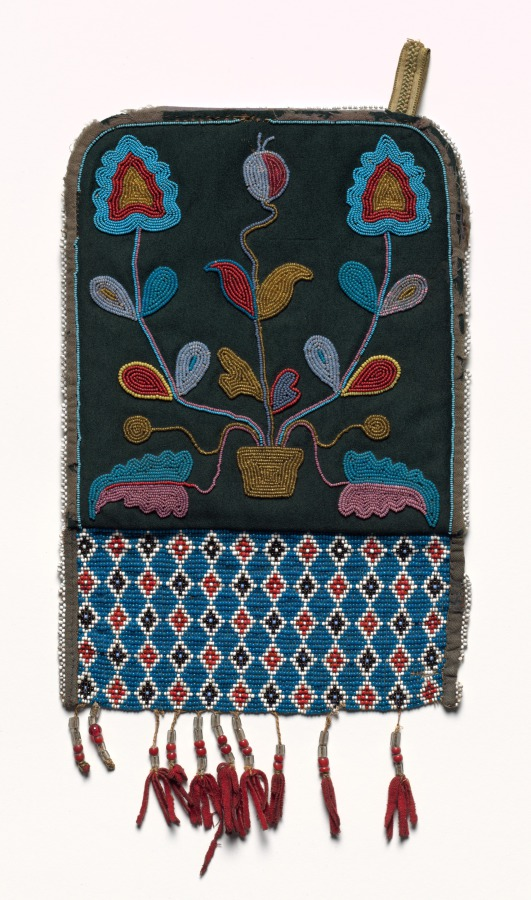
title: Bag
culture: Plains or Northeastern Woodlands, Nehiyawak (Cree) or Metis People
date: 1850–1900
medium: beadwork on cloth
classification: Textile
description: This colorful bag is beaded on both sides. On one side, the flowers resemble the sun, which native peoples of the Woodlands regard as the supreme spirit; the visual parallel is probably intentional. On the other side, a different plant symmetrically spreads its leaves and flowers across a dark, contrasting ground.